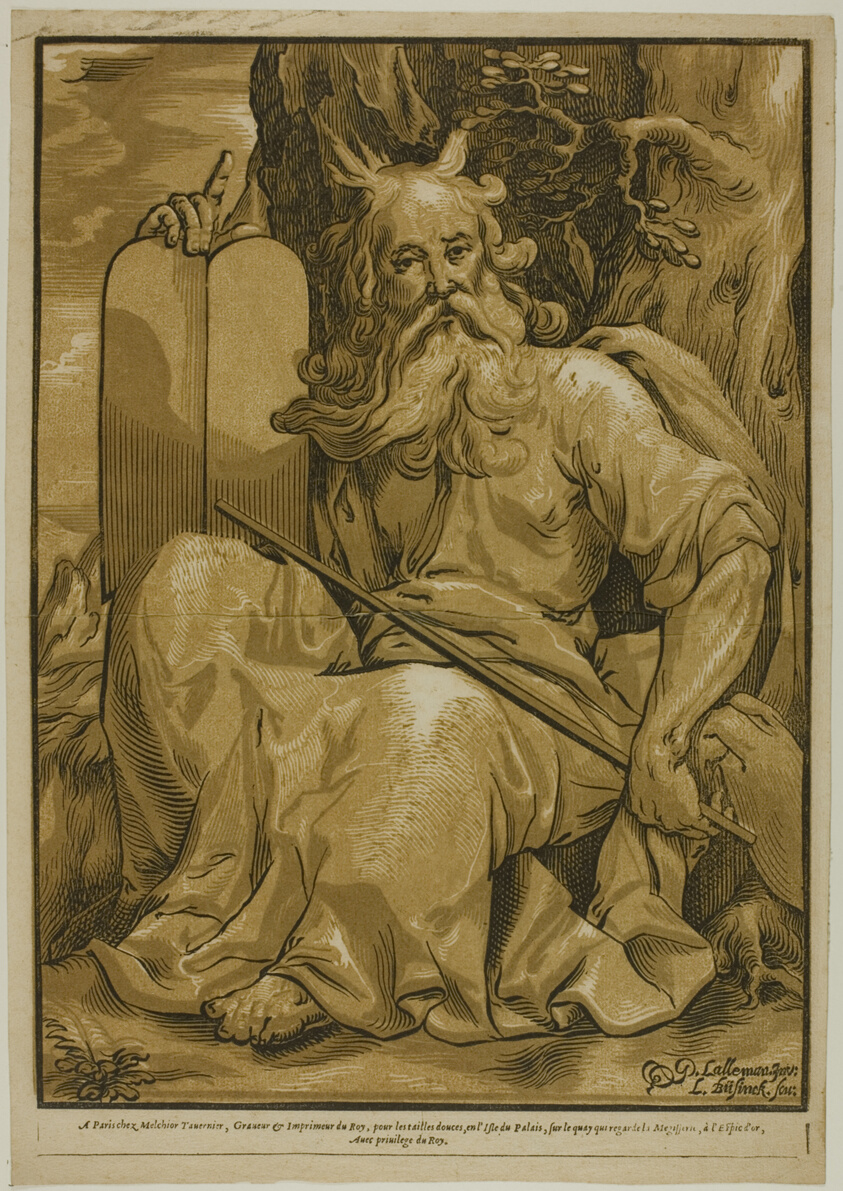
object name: Print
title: Moses with the Tables of the Law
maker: Ludolph Büsinck (German, 1585-1648); after G.L'Allemand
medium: Chiaroscuro woodcut from three blocks in black on paper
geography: Germany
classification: woodcut; print; prints and drawing